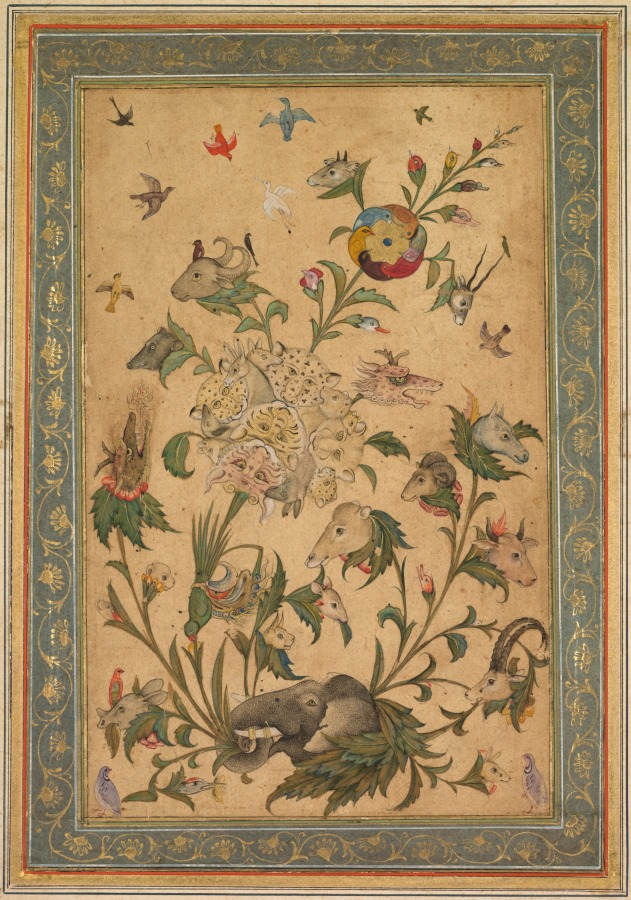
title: A floral fantasy of animals and birds (Waq-waq)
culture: Mughal India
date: early 1600s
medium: Gum tempera and gold on paper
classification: Painting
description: A magical plant simultaneously brings forth and eats animal life in multiple forms. Playfully rendered, real and mythic creatures ripen on the vine. All stems issue from the elephant, who is about to eat the main branch, while he, in turn, emerges from one that is about to be cut by the teeth of an ibex at the lower right. This painting would have beguiled courtly connoisseurs who enjoyed discovering visual puns in a royal album. Learned viewers would note that an animal-bearing plant recalls medieval Persian stories about the mythical island of Waq-waq, inhabited by half-plant/half-animal creatures.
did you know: The dragon threatens to singe the boar’s beard.